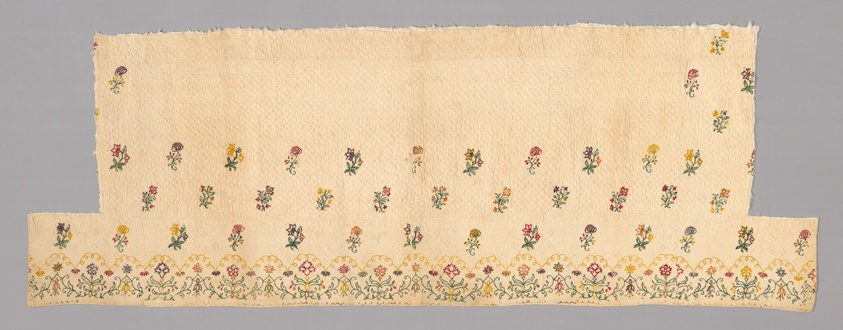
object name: Textile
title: Fragments from a Bedcover made of Petticoat Borders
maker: France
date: Late 18th century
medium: Cotton, plain weave; embroidered with wool threads in chain stitch; quilted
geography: France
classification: textile; needlework (visual works); weaving